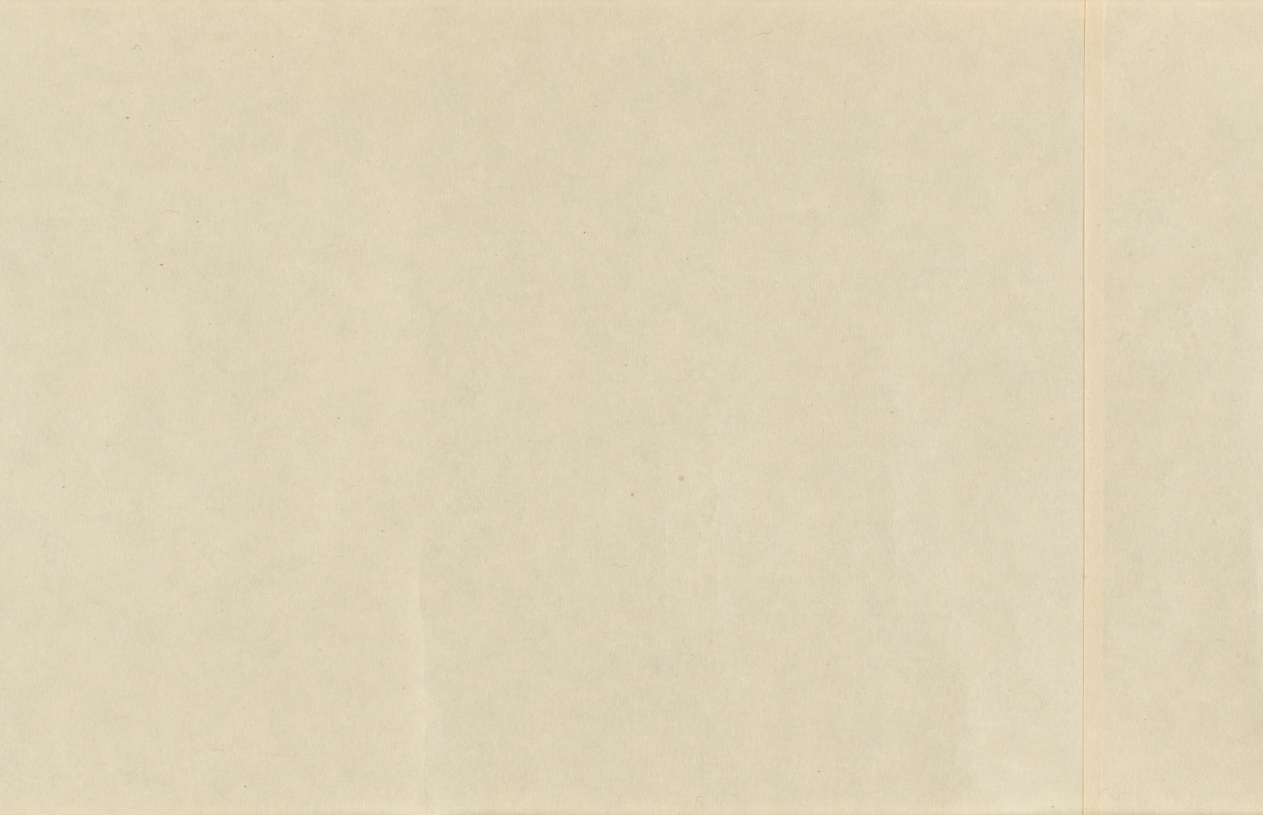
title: Eight Views of Xiao-Xiang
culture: Japan, Muromachi period (1392–1573)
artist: Sesson Shūkei (Japanese, c. 1492–c. 1577)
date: 1500s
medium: handscroll; ink on paper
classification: Painting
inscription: Signature and seal of artist at end of painting.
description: Eight Views of the Xiao and Xiang Rivers can be traced to 11th-century Chinese poems and paintings, the depiction of which had also become popular among Korean and Japanese painters. Xiao-Xiang refers to the region in present-day Hunan province where the Xiao and Xiang rivers converge. Few painters of the Eight Views had in fact seen the scenery; rather, they were trying to portray in ink and wash the lyrical qualities of dim light and a misty atmosphere typical of that region. Each of the poetic titles suggests a time of day, a season, or specific atmospheric conditions—subjects that challenged the abilities of the most talented artists. In this miniature painting (shukuzu) of the Muromachi period, Japanese Zen monk and painter Shukei Sesson depicted all eight views featured in Chinese prototypes: Wild Geese Descending to Sandbar; Returning Sails Off a Distant Coast; Mountain Market in Clearing Mist; River and Sky in Evening Snow; Autumn Moon over Dongting Lake; Night Rain on the Xiao and Xiang; Evening Bell from Mist-Shrouded Temple; and Fishing Village in Evening Glow.